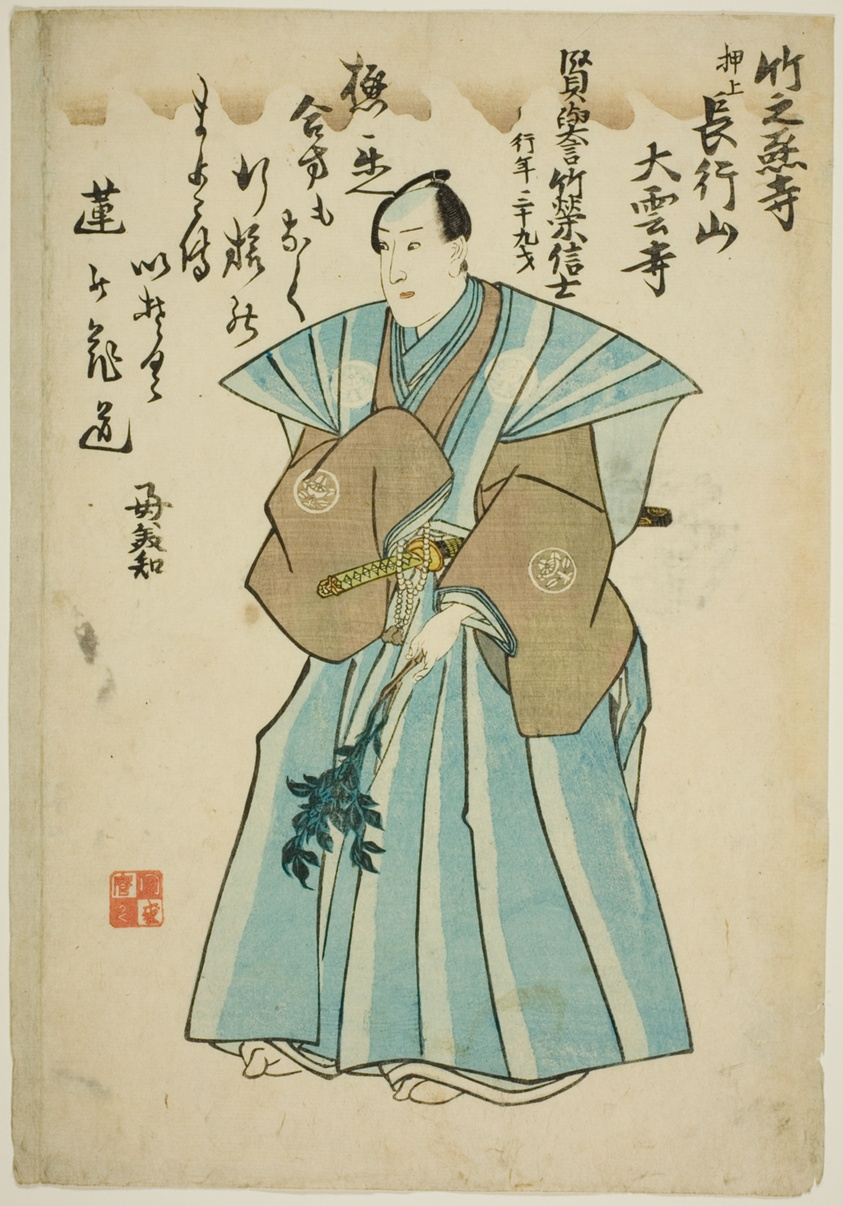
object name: Print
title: Memorial Portrait of the Actor Ichimura Takenojo V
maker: Attributed to Utagawa Kunimaro I; Japanese, active c. 1850-75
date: 1851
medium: Color woodblock print; oban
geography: Japan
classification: print; asian art